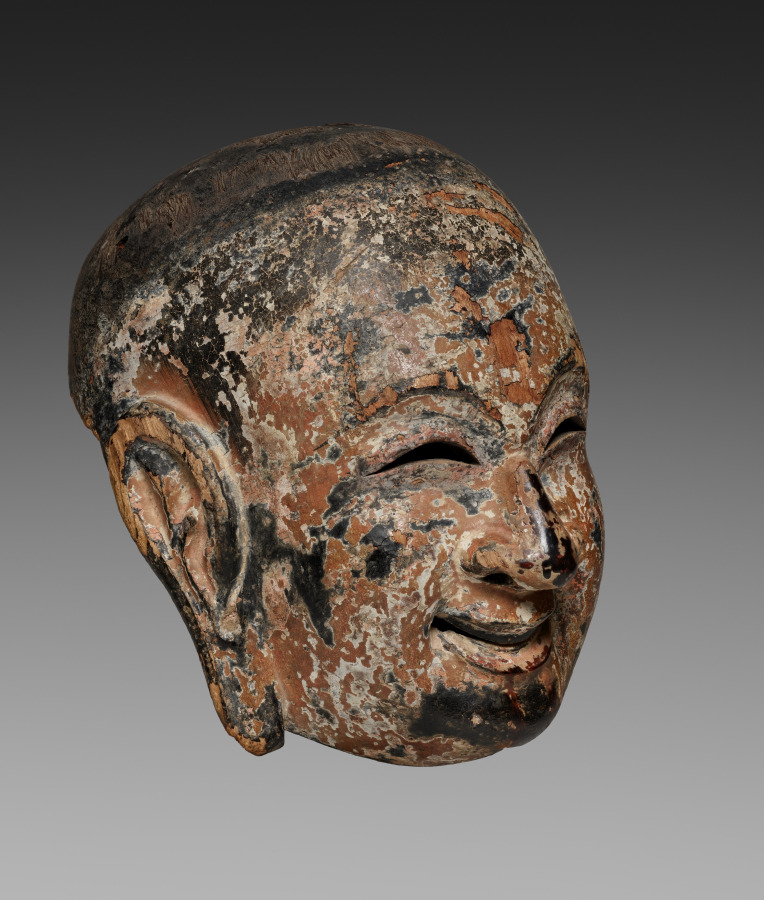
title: Gigaku Mask of Young Persian Boy (Taikōji)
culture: Japan, Nara period (710–94)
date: 710–94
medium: paulownia wood, lacquered and painted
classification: Sculpture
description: This mask is for the role of the son of an old Persian widower in gigaku, a theatrical dance repertoire imported to Japan from continental Asia during the seventh century. The old man and his sons mime prayers to the Buddha. While the mask would cover the entire head of the actor, there are openings for the eyes, nostrils, and mouth.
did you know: This is the mask for one of two sons who accompany a widower in ancient dance theater.